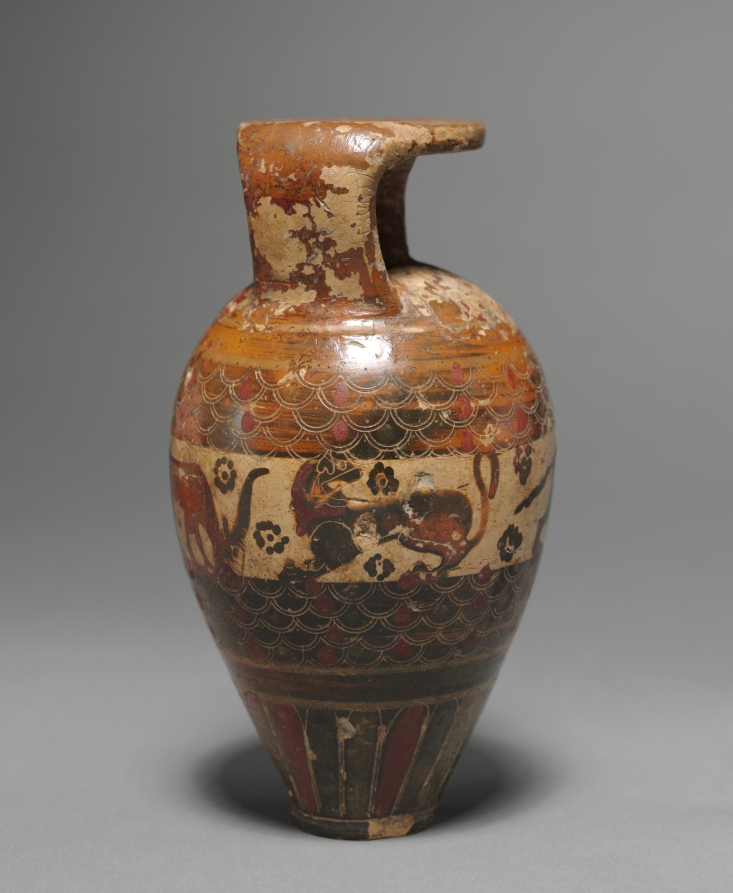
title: Protocorinthian (Early Black-Figure) Aryballos (Oil Flask): Animals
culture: Greek, Corinthian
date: c. 650–640 BCE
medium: ceramic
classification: Ceramic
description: Tongues encircle the rim, shoulder, and base of this small oil vessel, while two carefully incised bands of scales frame an animal frieze. Here, amid dot rosettes, are a bull, dog, and goat, all facing right, and a left-facing lion with head turned back. The black glaze has misfired red in many places, while added red enlivens numerous tongues, scales, and internal details.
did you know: Artists may have used a compass-like tool to create the intricate scale patterns.